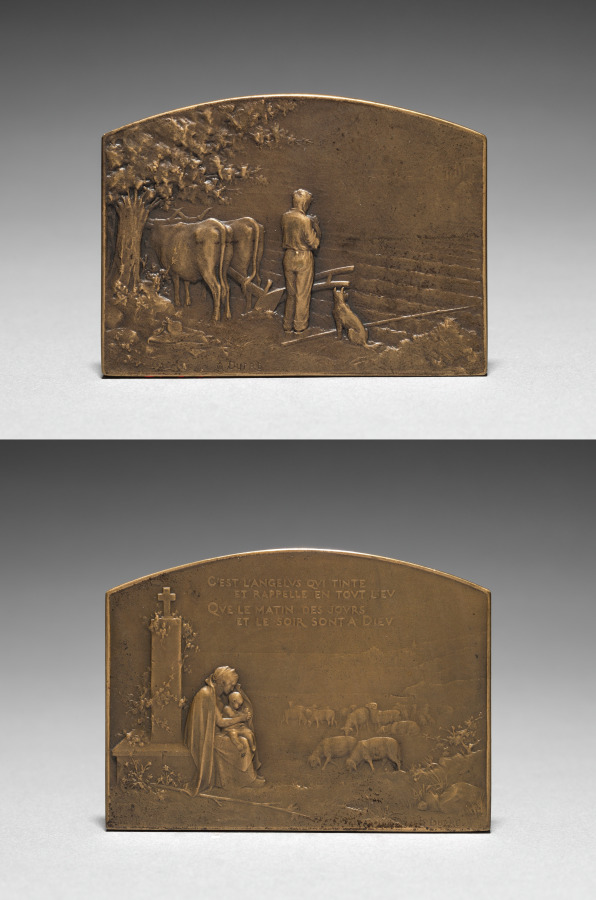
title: Medallion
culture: France, 19th-20th century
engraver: Georges Dupré (French, 1869–1909)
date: 1903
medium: bronze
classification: Metalwork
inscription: "G. Dupré."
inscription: G. Dupré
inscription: C'EST L'ANGELVS QUI TINTE / ET RAPPELLE EN TOVT LIEV / QUE LE MATIN DES JOVRS / ET LE SOIR SONT A DIEV